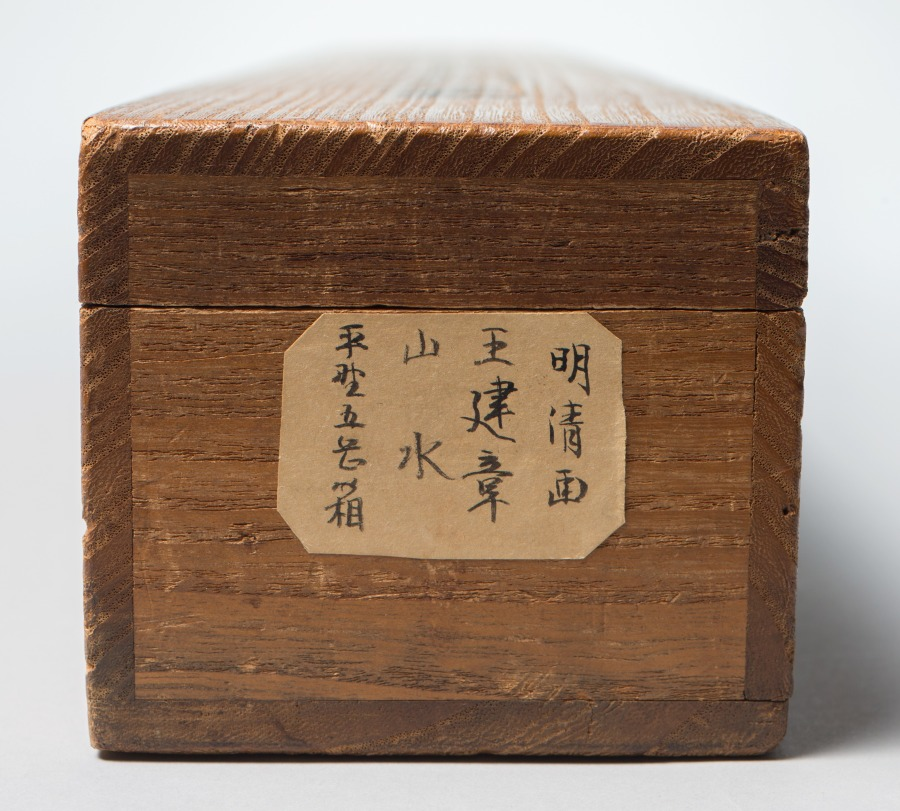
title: Solitary Colors of the Autumn Woods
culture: China, Ming dynasty (1368–1644)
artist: Wang Jianzhang (Chinese, active 1621–1662)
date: first half 1600s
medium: hanging scroll; ink and color on satin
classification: Painting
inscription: Artist's inscription, signature, and 2 seals: Cold frost falls on the fences,/ Solitary colors scatter the maples./ Reciting the chapter of "The Autumn Water,"/ I cannot still the emotion in my old heart. After the style of Fan Hua-yüan [Fan Kuan], Wang Chien-chang . [seals] Wang shih chih yin; Chien-chang. trans. LYSL/HK/WKH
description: Two gentlemen stand outside a thatched hut in a dense forest; some trees have bare branches indicating that the season is early autumn. Wang Jianzhang’s inscribed poem refers to a chapter called “Autumn Water” from Zhuangzi, a famous Daoist text written in the 3rd century BC: "Cold frost falls on the fences, / Solitary colors scatter the maples. / Reciting the chapter of “The Autumn Water,” / I cannot still the emotion in my old heart." Wang Jianzhang lived through the collapse of the Ming dynasty (1368–1644) and the rise of the Qing dynasty (1644–1911), when China was governed by the Manchus, an ethnic people from Manchuria who were traditionally viewed as “barbarians” by the Chinese. The poetic reference to Zhuangzi’s “Autumn Water” seems to discreetly convey Wang’s feelings about his country being taken over. “Autumn Water” was about learning to take steps in the foreign way, but not acquiring a foreign tongue. Perhaps Wang was lamenting his conflicted situation. For survival he had to adapt to the new political and social climate, while still trying to maintain his own identity and Chinese traditions.